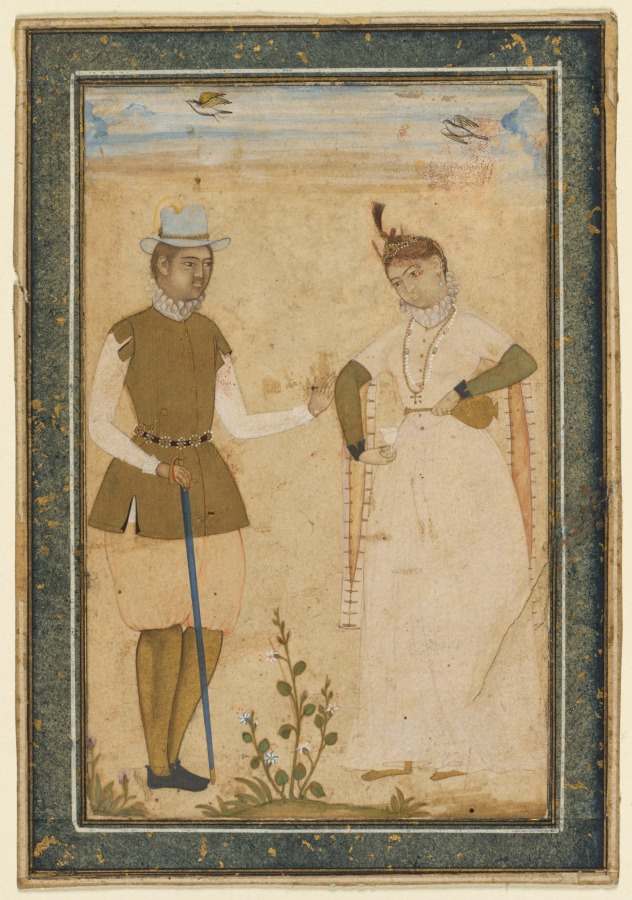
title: A European Couple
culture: India, Bijapur, Deccan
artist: attributed to Ali Riza, the "Bodleian Painter" (Indian)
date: c. 1610–27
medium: Gum tempera and gold on paper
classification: Painting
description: This painting of a European couple seems to be based on close observation and a desire to record the appearance of foreigners. The artist has accurately depicted the 17th-century European clothing in great detail, particularly in the collar ruffs, linen cuffs, and ornate jewelry worn by both figures.